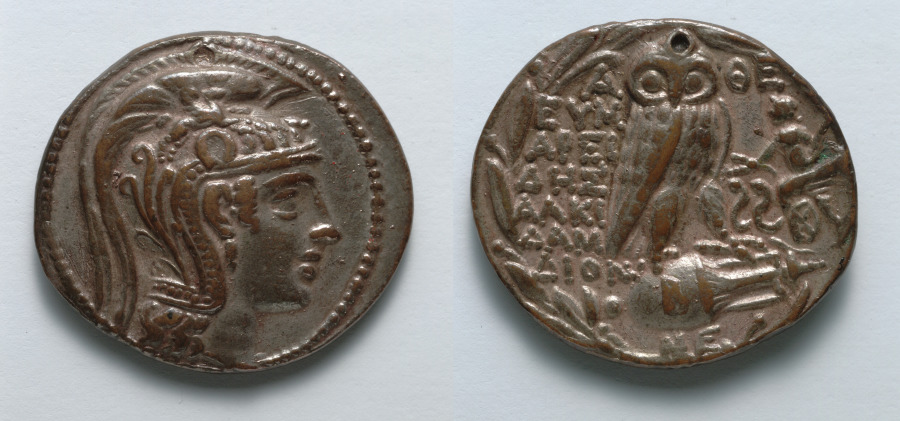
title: Electrotype Replica of Tetradrachm: Head of Athena (obverse); Owl (reverse)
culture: Greece (?)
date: 1838–1916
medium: Silver-plated copper alloy (?)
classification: Coins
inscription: EYM/APEI/ΔΗΣ/ΑΛΚΙ/ΔΑΜ/ΔΙΟΝ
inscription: ΑΘΕ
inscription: ΜΕ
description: With a green tint betraying its copper content, this coin is an electrotype replica created more than a century ago. It precisely replicates the form of a 2nd-century BC original. Retaining the basic scheme of Athena and owl from earlier Athenian coinage, these “New Style” tetradrachms—as scholars call them—give the goddess a more naturalistic appearance and add an amphora, olive wreath, and magistrate names to the reverse.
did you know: This silver-plated replica weighs about 12 grams, nearly 30% less than a pure silver tetradrachm.